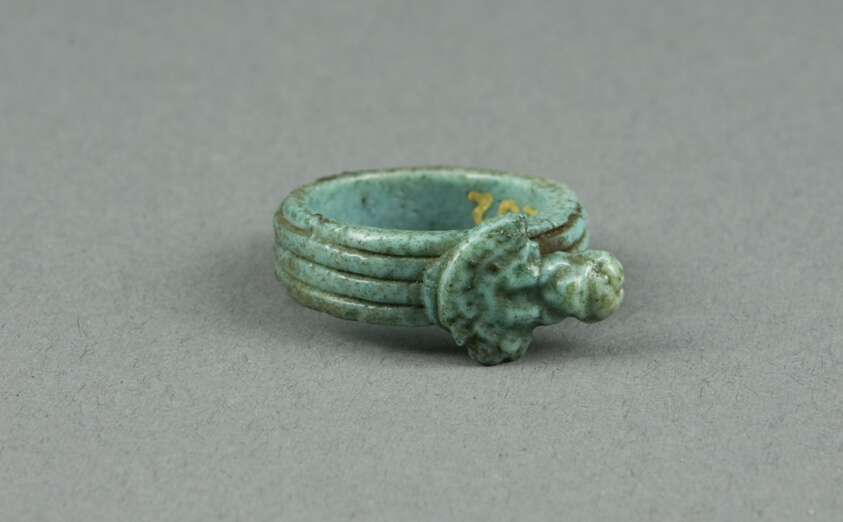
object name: Costume and Accessories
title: Ring: Aegis of Sekhmet/Bastet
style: egyptian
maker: Egyptian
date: New Kingdom–Third Intermediate Period, Dynasty 15–25 (about 1550–664 BCE)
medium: Faience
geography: Egypt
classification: ceramics; jewelry; ancient art; costume; faïence (composite material)